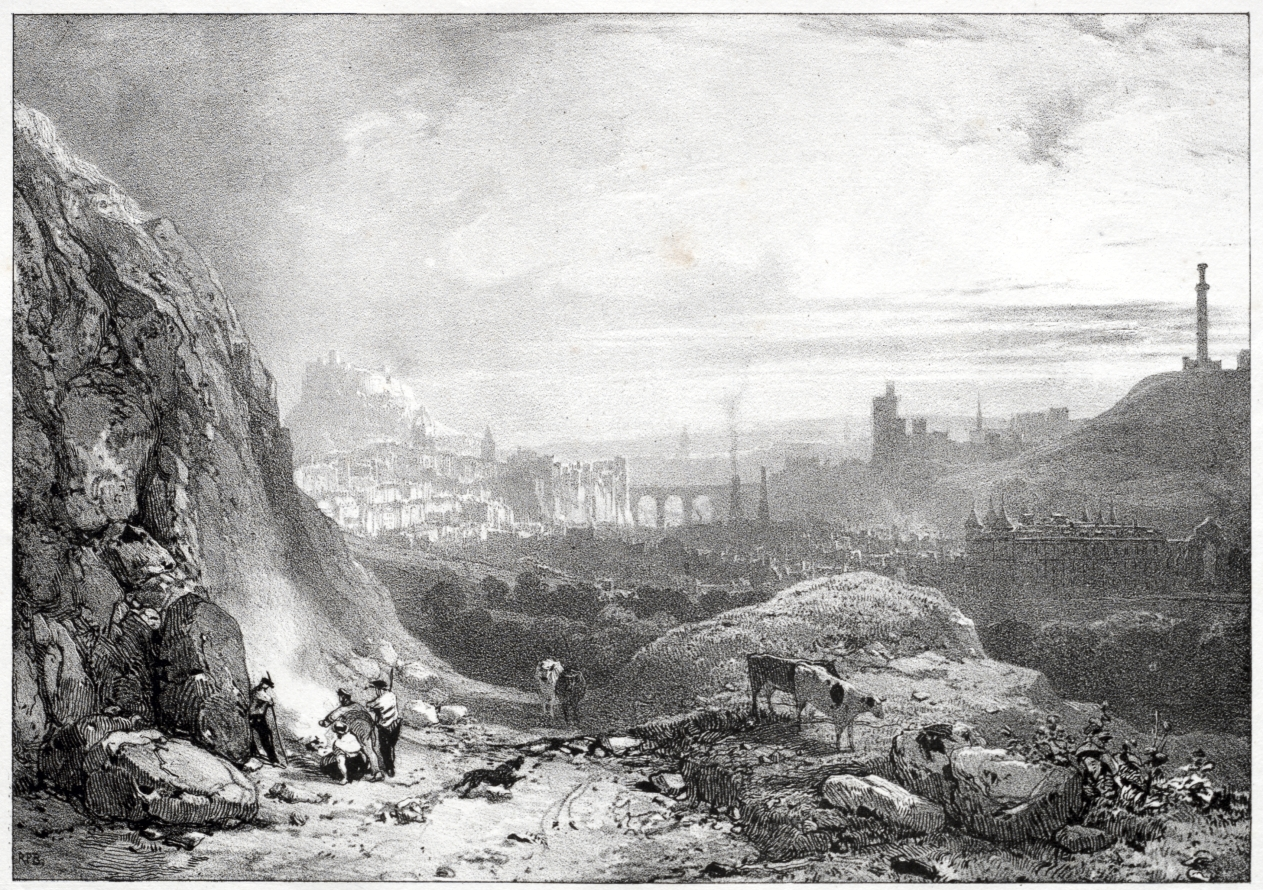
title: Edinburgh from St. Anthony Chapel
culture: England, 19th century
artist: Richard Parkes Bonington (British, 1802–1828)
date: 1826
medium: lithograph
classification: Print